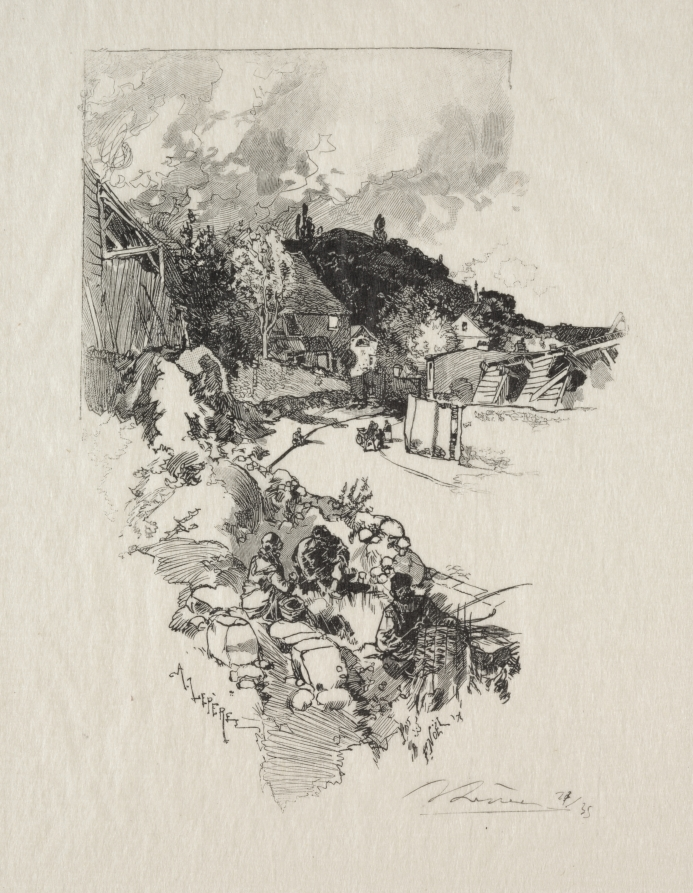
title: Route de Versailles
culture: France, 19th-20th century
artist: Auguste Louis Lepère (French, 1849–1918)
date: 1886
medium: wood engraving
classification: Print